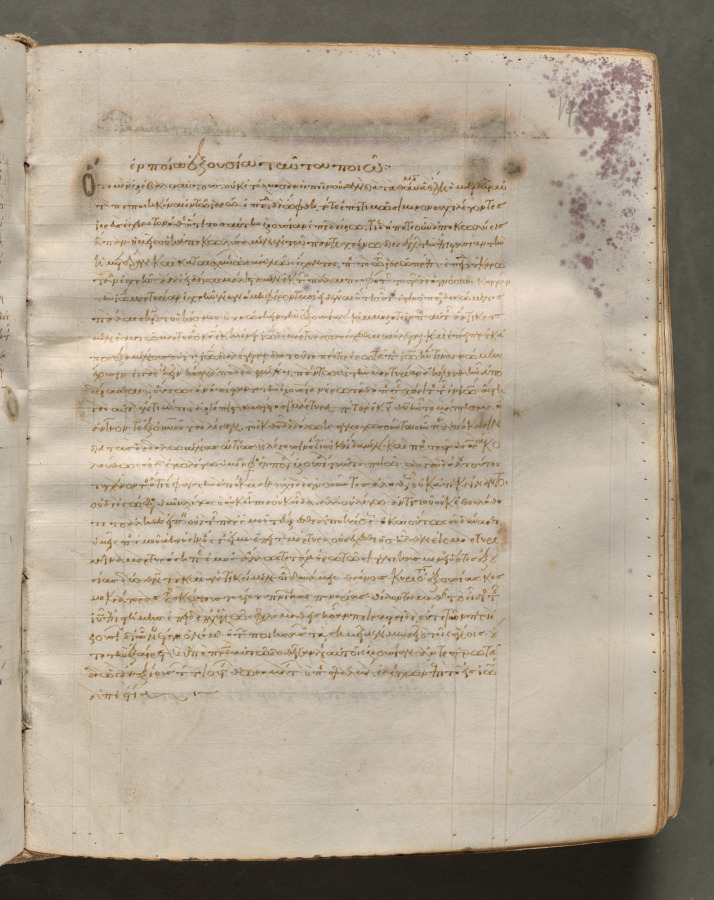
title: Text, folio 176 (recto), from a Gospel Book with Commentaries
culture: Byzantium, Constantinople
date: c. 1000–1100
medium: ink, tempera, and gold on vellum; leather binding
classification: Bound Volume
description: Each of the four gospels in this book opens on a page with brilliantly illuminated borders depicting the author of the text as well as birds-principally peacocks, symbols of the immortality of the soul-and fountains, representing the fountain of life and the salvation of the soul. This volume consists of 428 leaves with texts in Greek. Its level of sophistication suggests that it was probably written and decorated in a monastery in Constantinople.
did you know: Gospel Books were carried in procession through Byzantine churches.